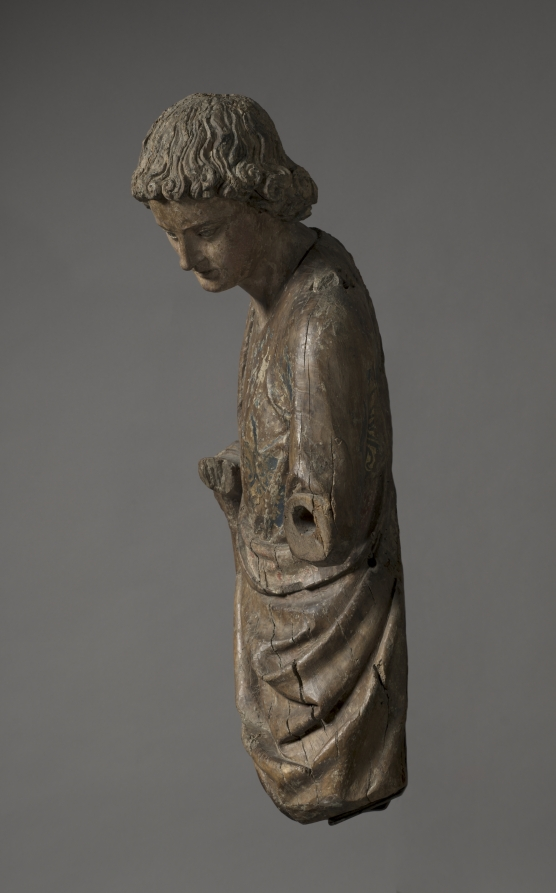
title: Angel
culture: France, vicinity of Reims, 13th century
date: c. 1250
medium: walnut with traces of gilding and polychromy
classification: Sculpture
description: Surviving in fragmentary condition, this pair of angels lacks lower arms, hands, wings, and attributes. Their original paint and gilding, now almost entirely lost, once rendered their garments a rich brocade and their hair a luxuriant gold. Nonetheless, in their graceful poses and sublime faces—which may portray tragic interest, anguish, or deep concern—their original delicacy and power are still evident. They embody the monumental style of 13th-century High Gothic cathedral sculpture in France. Their style specifically suggests they were carved in or around Reims, possibly by sculptors associated with the cathedral there. Their original placement is unknown, but they may have flanked an altar on columns.